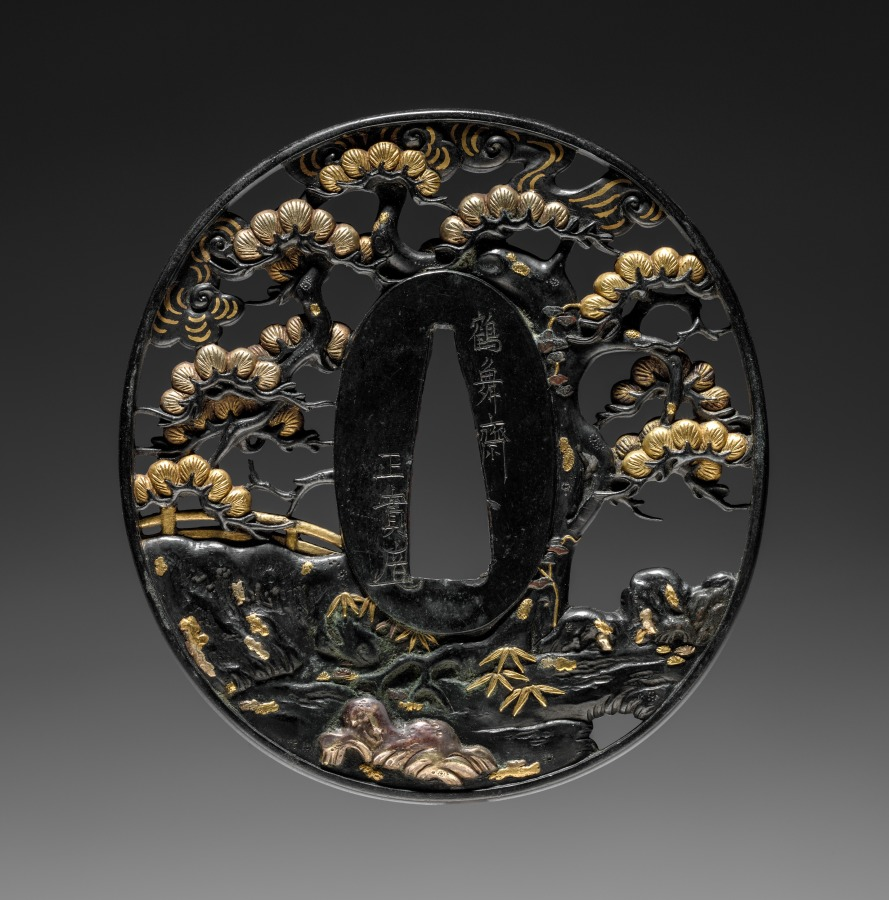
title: Sword Guard (Tsuba) with Bridge and Pine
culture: Japan, Edo period (1615–1868)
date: mid-1800s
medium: iron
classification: Arms and Armor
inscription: signed: 鶴舞齋正實